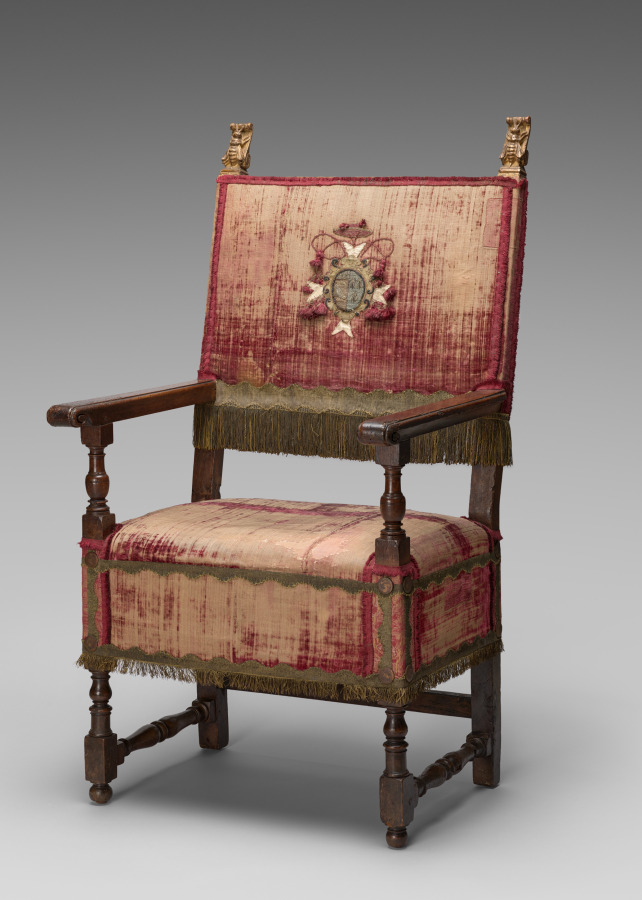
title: Armchair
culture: Italy, 17th century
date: 1600s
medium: walnut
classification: Furniture and woodwork